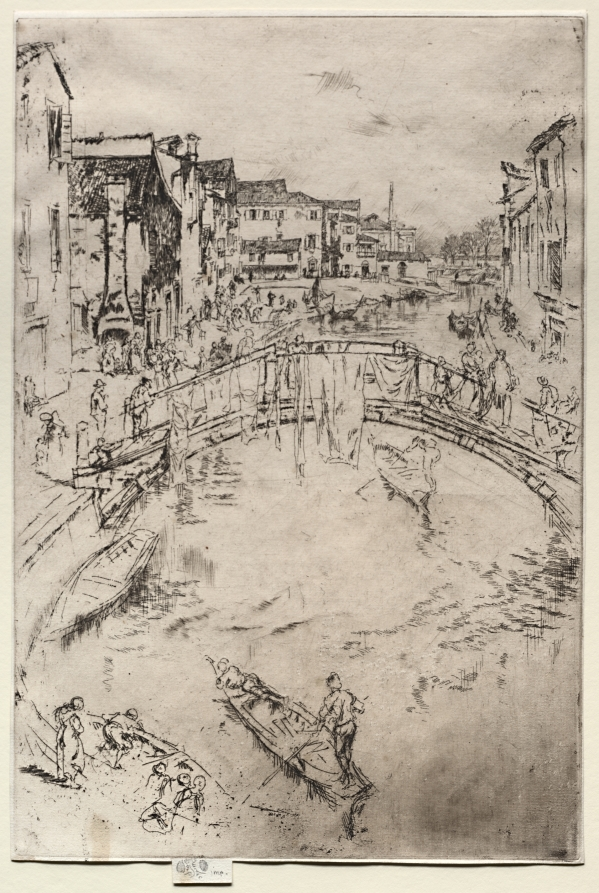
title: The Bridge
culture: America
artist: James McNeill Whistler (American, 1834–1903)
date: 1886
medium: etching and drypoint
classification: Print